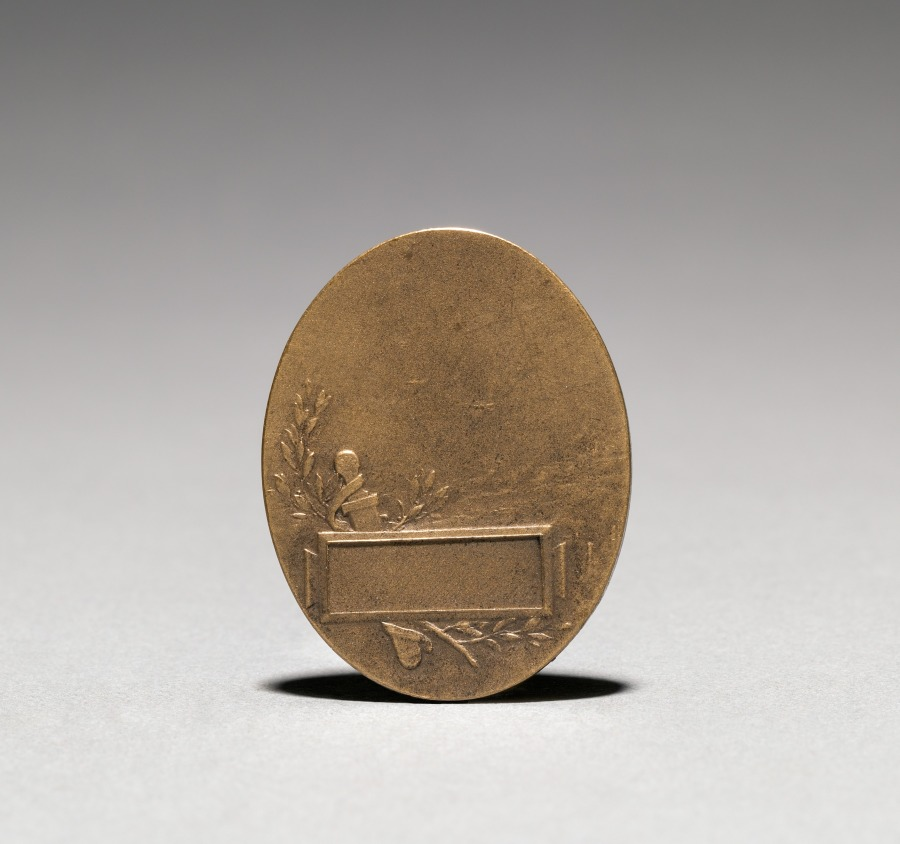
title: Medallion (reverse)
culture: France, 19th-20th century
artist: Jean Paul Aube (French, 1837–1916)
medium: bronze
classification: Metalwork